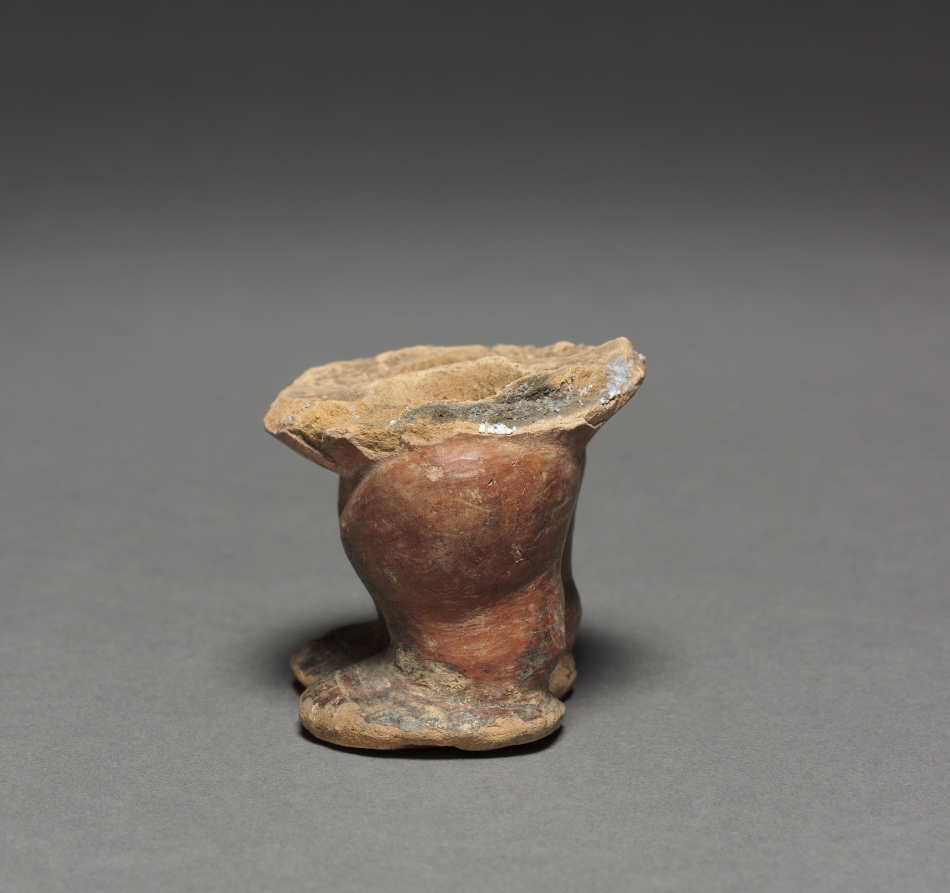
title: Jar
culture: Colombia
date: before 1550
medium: black ware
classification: Ceramic